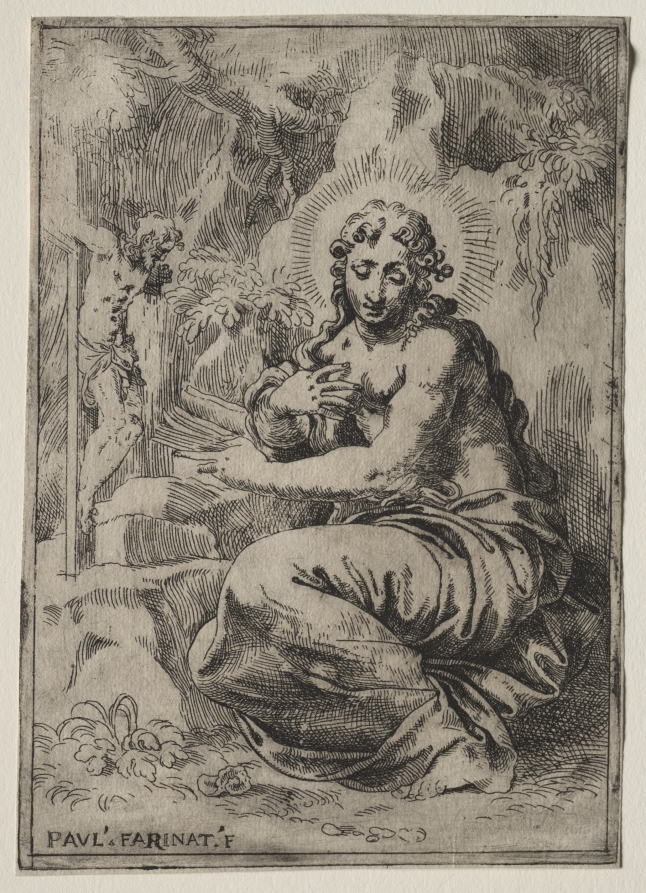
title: The Magdalen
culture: Italy, late 16th century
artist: Paolo Farinati (Italian, 1522–1606)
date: late 16th century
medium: etching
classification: Print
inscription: on verso: Inscriptions and marks in graphite and red pencil/ chalk